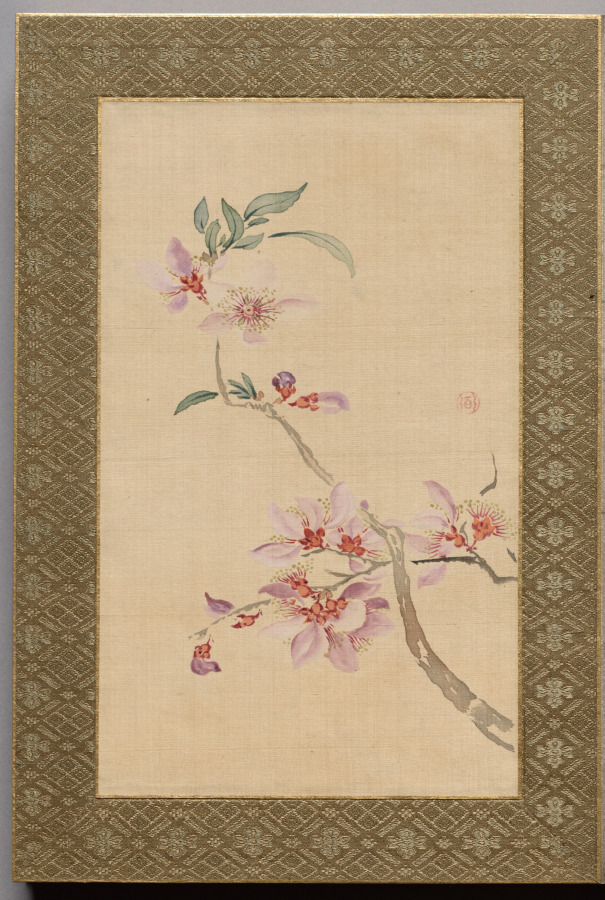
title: Preface from Flowers and Grasses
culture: Japan, Edo period (1615–1868)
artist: Tsubaki Chinzan (Japanese, 1801–1854)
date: 1841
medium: leaf from folding-album; ink on paper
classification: Painting